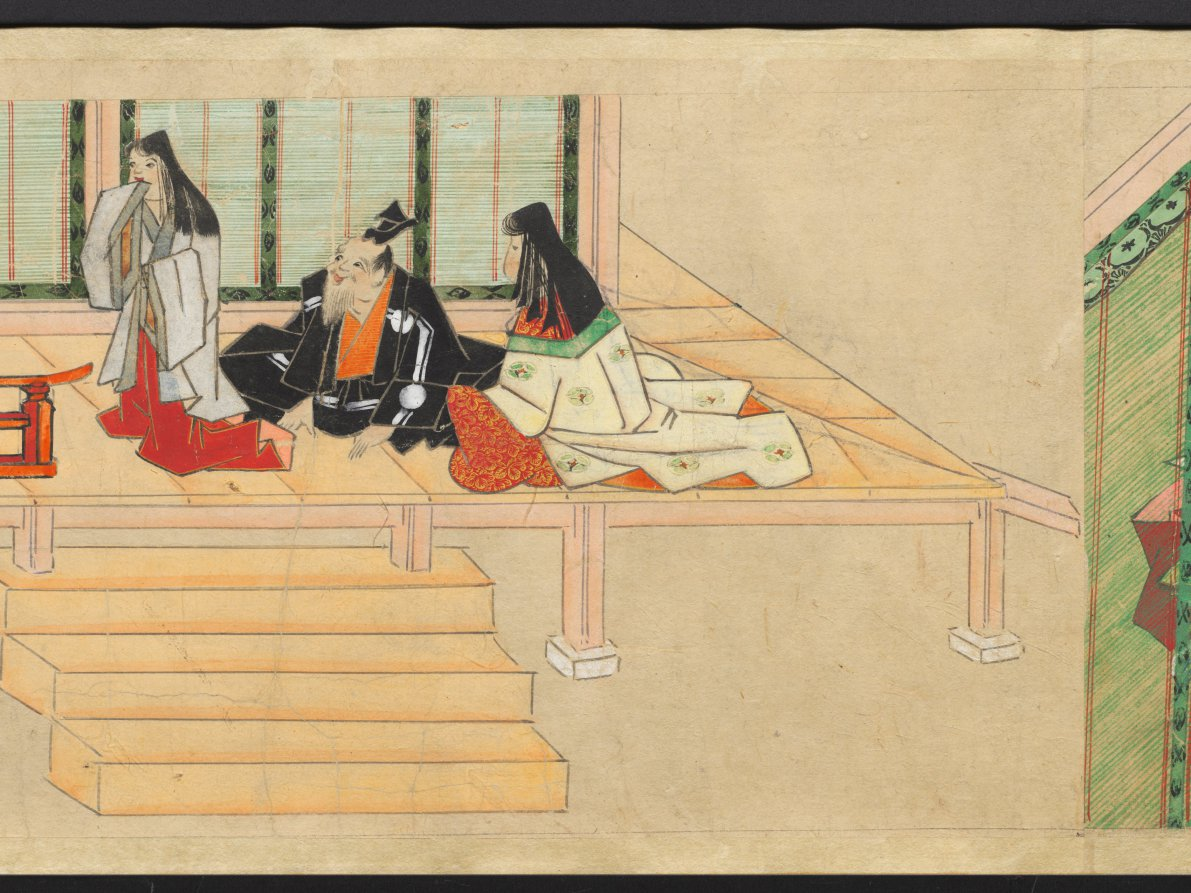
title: The Saltmaker's Story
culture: Japan, Edo period (1615–1868)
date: early 1600s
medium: One of a pair of handscrolls; ink, color, and gold on paper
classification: Painting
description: Once read and copied by girls at New Year’s celebrations and included in dowries, The Saltmaker’s Story is a rags-to-riches tale in which daughters are gifts from the gods. Despite his simple outlook, the main character progresses from humble roots as an associate at Kashima Shrine to the elite status of grandfather of the emperor through the intervention of the Kashima deity. The Saltmaker’s Story is traditionally presented in a set of three scrolls, but the text of this set has been removed by a previous owner, who remounted the illustrations as a pair. The paintings of this one take us from right to left through the second half of the tale.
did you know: This handscroll originally had texts before its paintings, but the texts were removed.